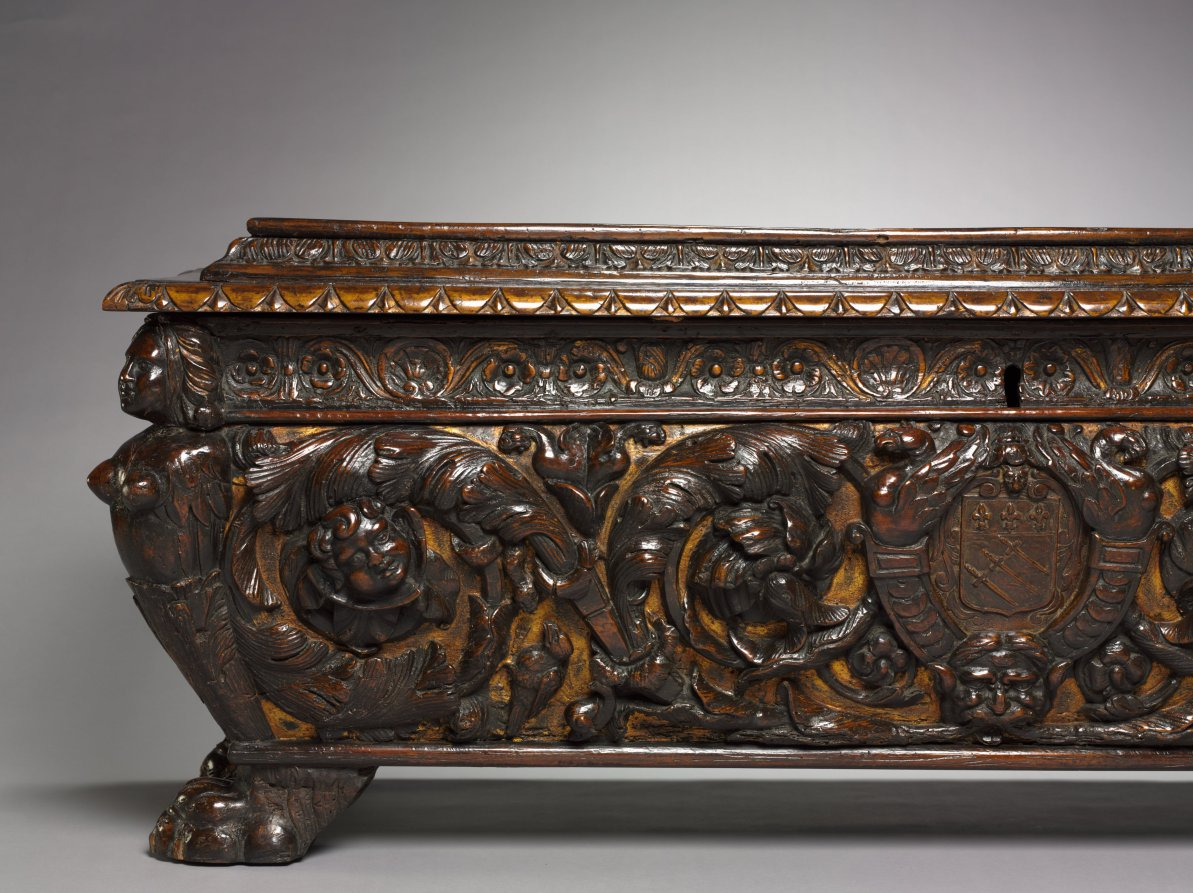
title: Marriage Chest (Cassone)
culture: Italy, early 16th century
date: early 1500s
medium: walnut with traces of gilding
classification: Furniture and woodwork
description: Large storage chests resembling ancient Roman burial vaults-a popular collectible among wealthy families during the Renaissance-were often associated with an important marriage and contained the wife’s dowry of clothes and precious objects. This particular example displays the arms of the Spada Family of Rome amidst a richly carved façade on a gilded ground. Sometimes cassoni were carried in the marital procession from the bride’s home to that of her future husband, emphasizing the power and wealth of both families.